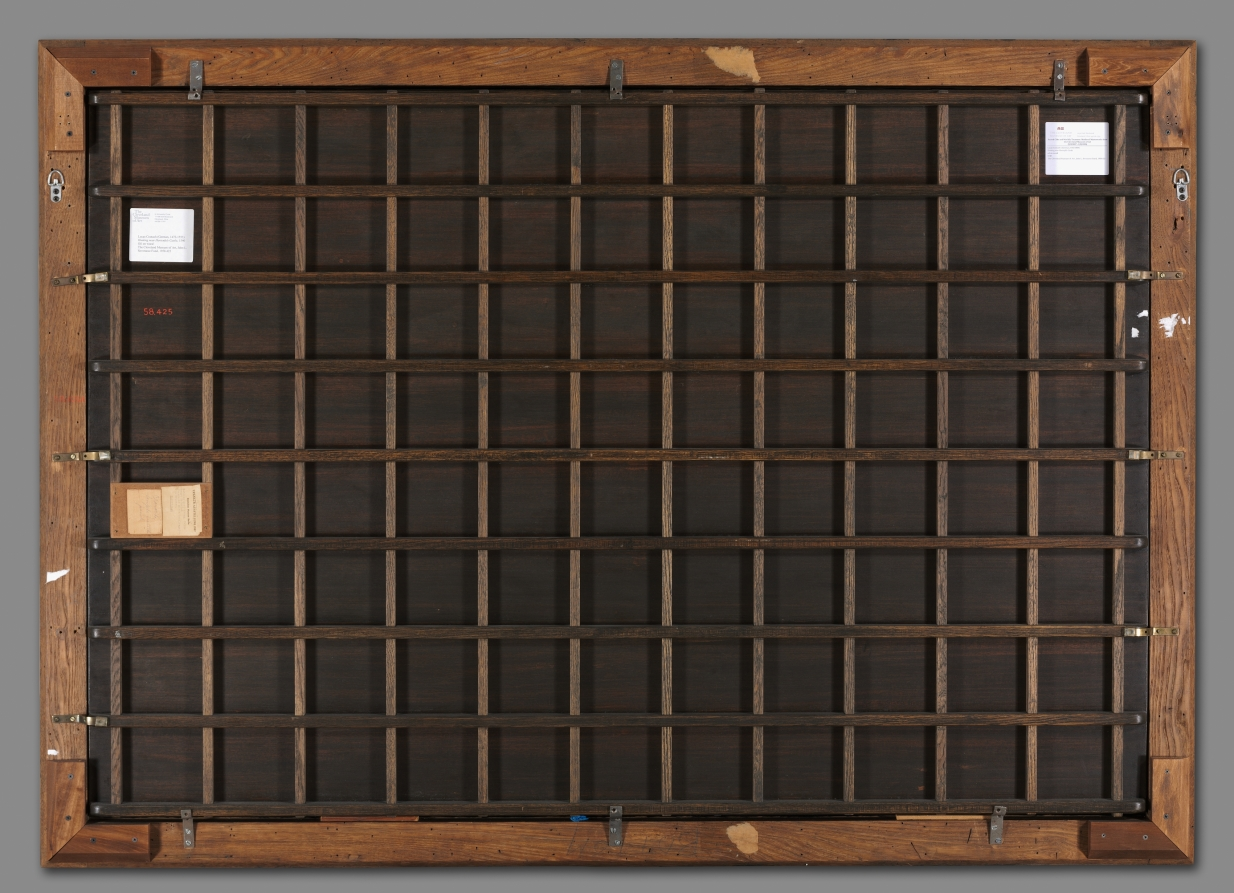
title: Hunting near Hartenfels Castle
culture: Germany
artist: Lucas Cranach (German, 1472–1553)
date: 1540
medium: oil, originally on wood, transferred to masonite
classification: Painting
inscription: Signed lower right on boat with a winged serpent, and dated: 1540 [inventory number, lower right: 1577]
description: The Protestant rulers of Saxony commissioned this animated hunt scene, set near their residence seen in the background, Hartenfels Castle (in eastern Germany). John Frederick the Magnanimous, in the bottom left corner, wears dark green hunting attire; he spans his crossbow and waits for his courtiers and dogs to chase a stag across the river. His wife, the Electress Sibylle, stands at right, poised to take the first ceremonial shot. The prince electors of Saxony were passionate practitioners of hunting with dogs—elaborate, highly rehearsed occasions, coordinated by the use of signals from hunting horns. Cranach dated this work and his signature is the winged snake at lower right. 1577 in the right corner is an inventory number.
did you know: Humans, dogs, and deer make up most of the creatures in this busy scene—but not all of them! Look closely at the background to spot a bear and three boars.